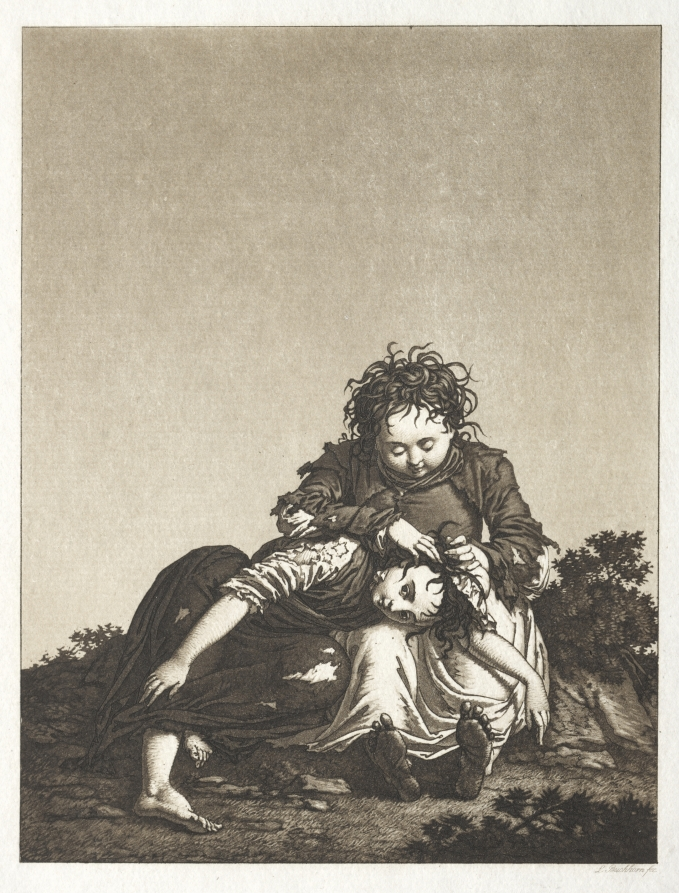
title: The Young Beggars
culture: Germany, late 18th-early 19th century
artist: Karl Ludwig Bernhard Buchhorn (German, 1770–1856)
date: c. 1800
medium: aquatint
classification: Print